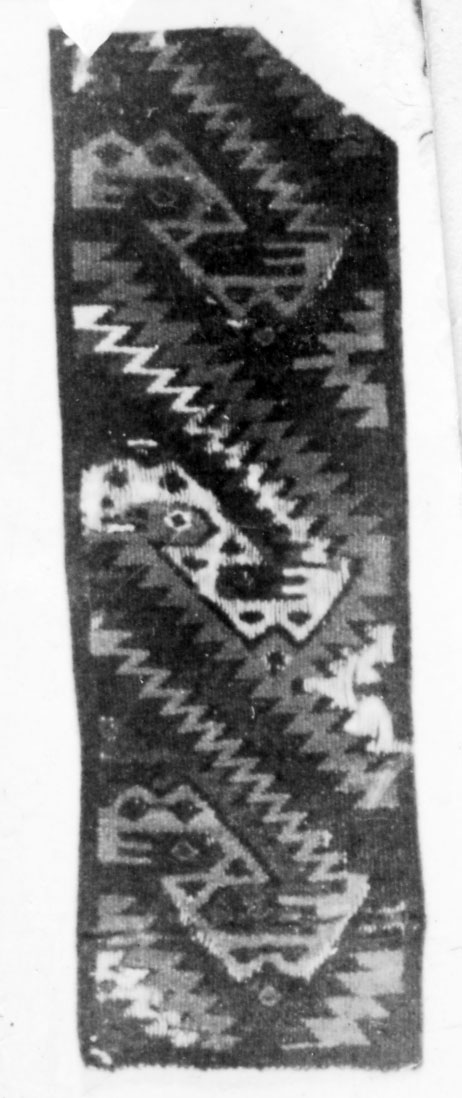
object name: Textile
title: Fragment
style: chimú, late intermediate period, Pre-Columbian, americas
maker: Probably north or central coast, Peru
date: A.D. 1000/1476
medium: Tapestry weave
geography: Peru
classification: textile; weaving